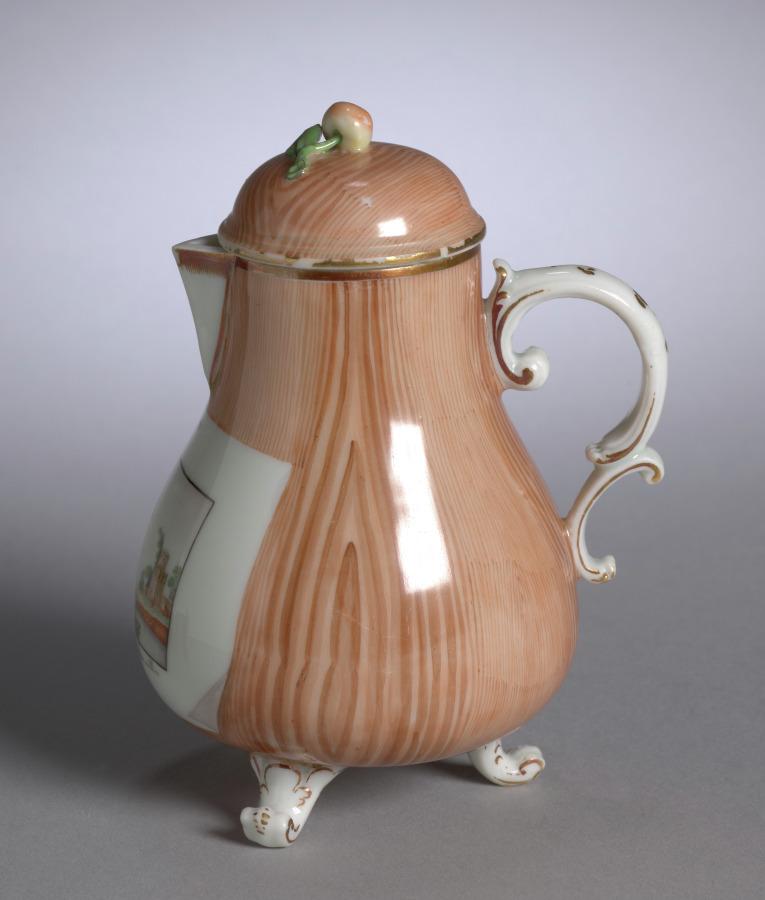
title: Covered Cream Jug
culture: France, 18th century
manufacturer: Niderviller Factory (French)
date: c. 1775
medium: hard-paste porcelain with enamel and gilt decoration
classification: Ceramic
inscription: inscribed at lower right corner of trompe l'oeil print: Niderviller.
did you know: Cream jugs with lids or covers usually held warm cream for coffee or tea.